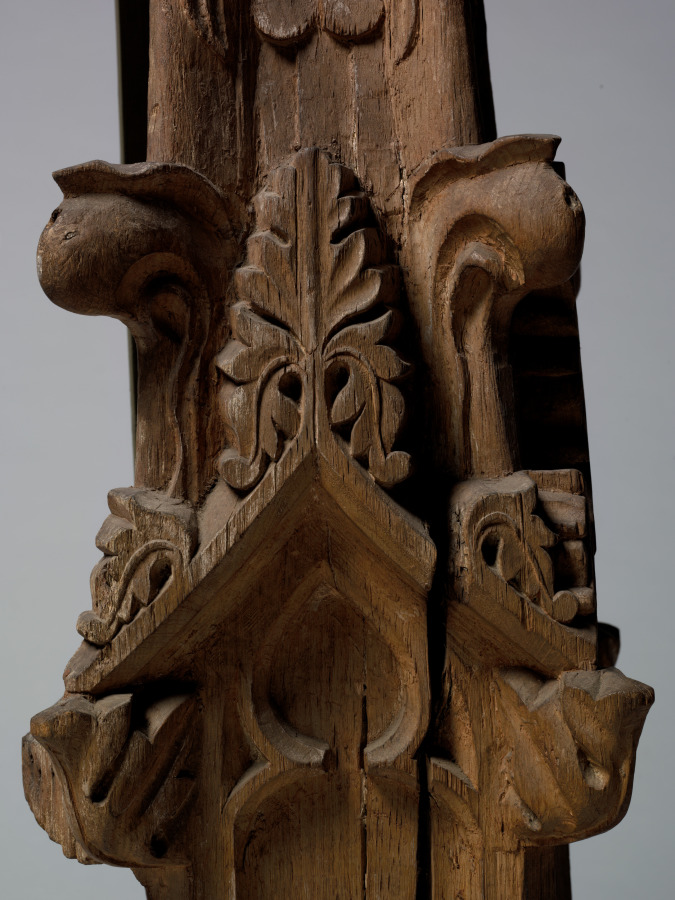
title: Pinnacle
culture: France, 15th century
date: 1400s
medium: oak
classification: Furniture and woodwork